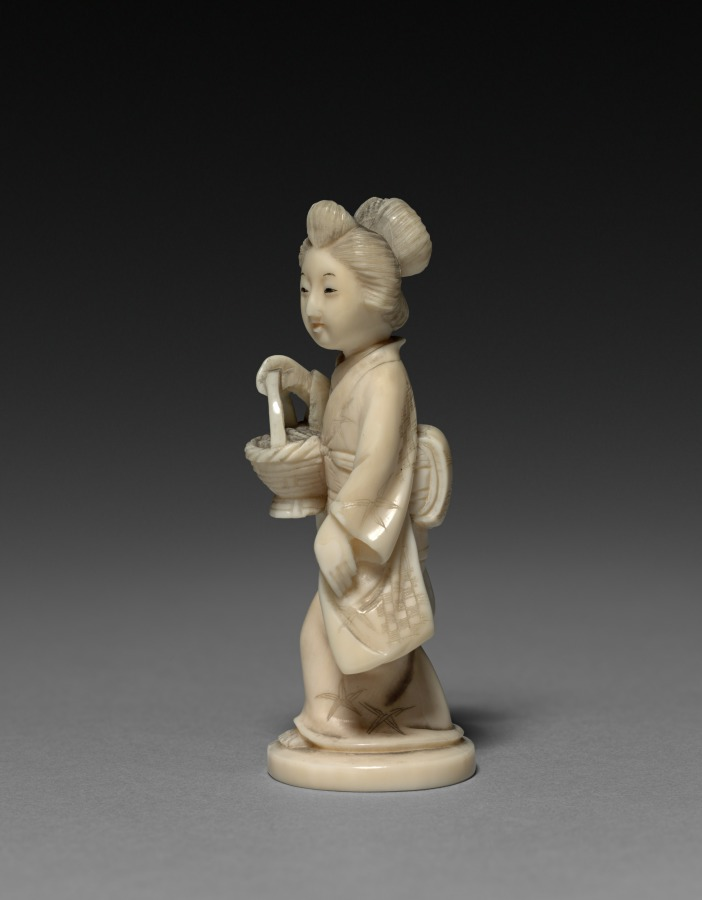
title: Woman Carrying a Basket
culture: Japan, Meiji period (1868–1912)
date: early 1900s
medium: ivory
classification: Ivory